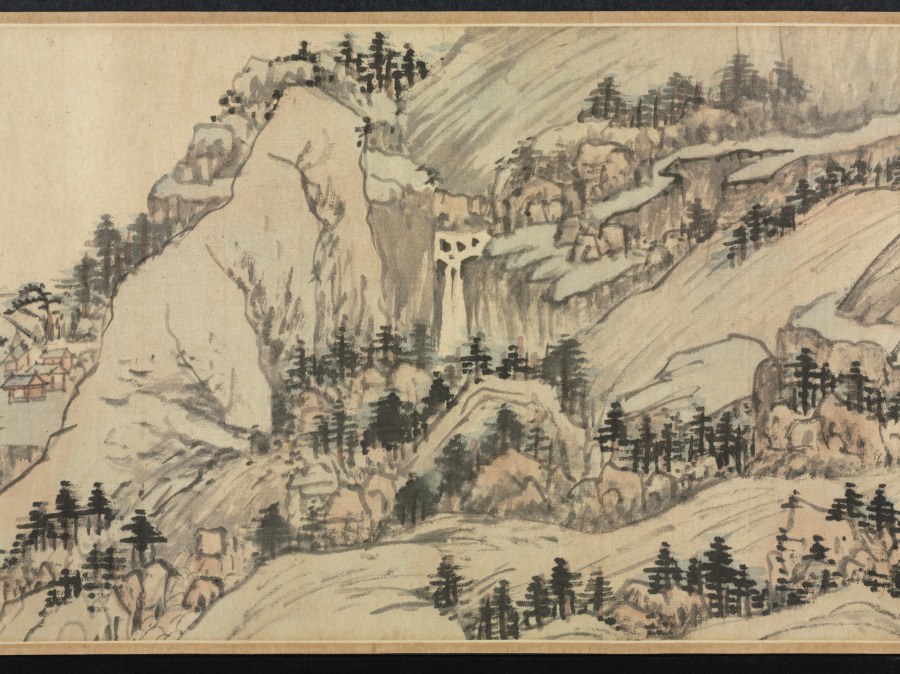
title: Dream Journey among Rivers and Mountains, no. 90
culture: China, Qing dynasty (1644-1911)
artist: Cheng Zhengkui (Chinese, 1604–1676)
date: 1658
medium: Handscroll; ink and color on paper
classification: Painting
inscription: 江山臥遊圖其九十, 青溪道人, 戊戌夏五。 [印] 程正揆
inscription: Title and inscription by Huang Yi 黃易 (1744–1802), and 3 seals.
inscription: 1 colophon and 9 additional seals: 3 seals of Dai Zhi 戴植 (active about 1821–1850); 1 colophon, dated 1914, and 3 seals of Yan Shiqing 顏世清 (1873–1929); 3 seals of Wang Nanping 王南屏 (1924–1985).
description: Cliffs and waterfalls interspersed with trees and dotted vegetation are spread over this handscroll. Long paths wind their way through villages, beside cottages, shrines, and over bridges. In the past, Chinese literati officials liked to take a “dream journey” along mountains and rivers when viewing landscape paintings in their studios. Scenery of this kind thus became a way to escape from the world of bureaucracy and administration. The painter Cheng Zhengkui used the title “Dream Journey” for a whole series of paintings, of which this is number 90. He is said to have painted 500 of them, but the actual count remains unknown.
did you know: Cheng Zhengkui planned to make 100 dream journey paintings but may have ultimately made 500.